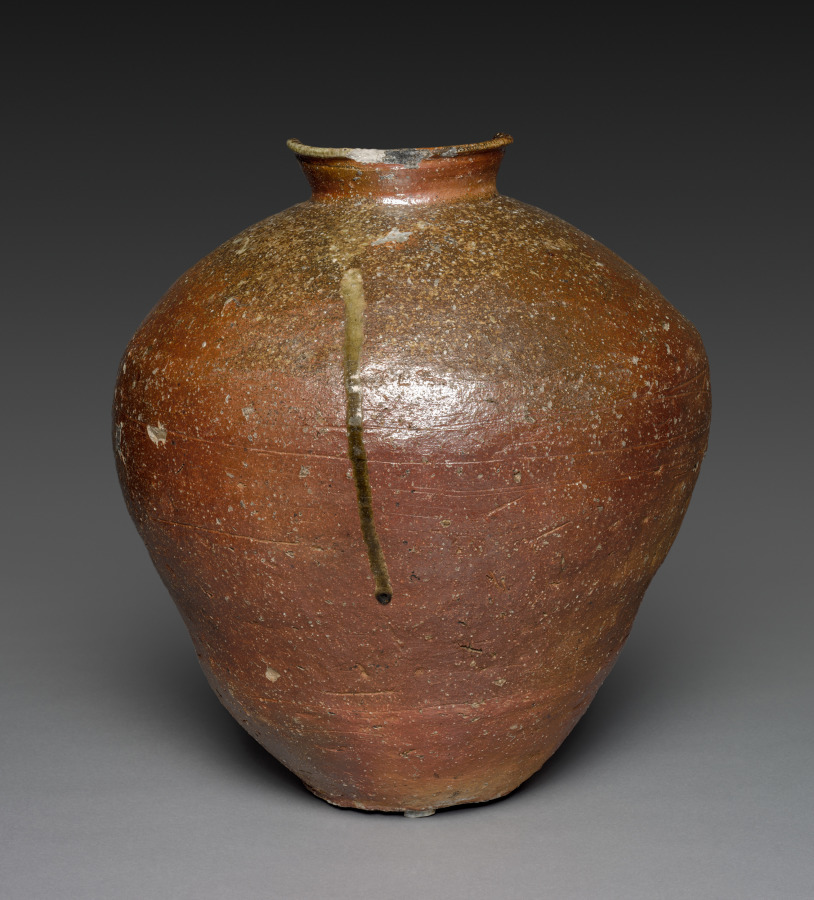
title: Storage Jar (Tsubo)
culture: Japan, Muromachi period (1392–1573)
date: 1400s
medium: Stoneware with natural ash glaze (Shigaraki ware)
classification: Ceramic